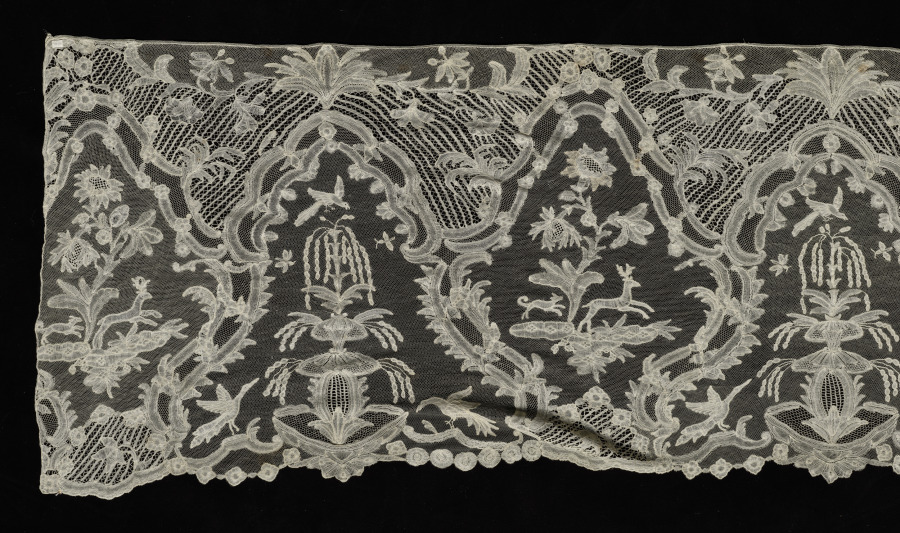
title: Lace Flounce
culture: Belgium, Brabant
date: 1700s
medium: Linen: bobbin lace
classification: Lace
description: This piece of lace depicts fountains alternating with a deer and a dog by a flowering tree.